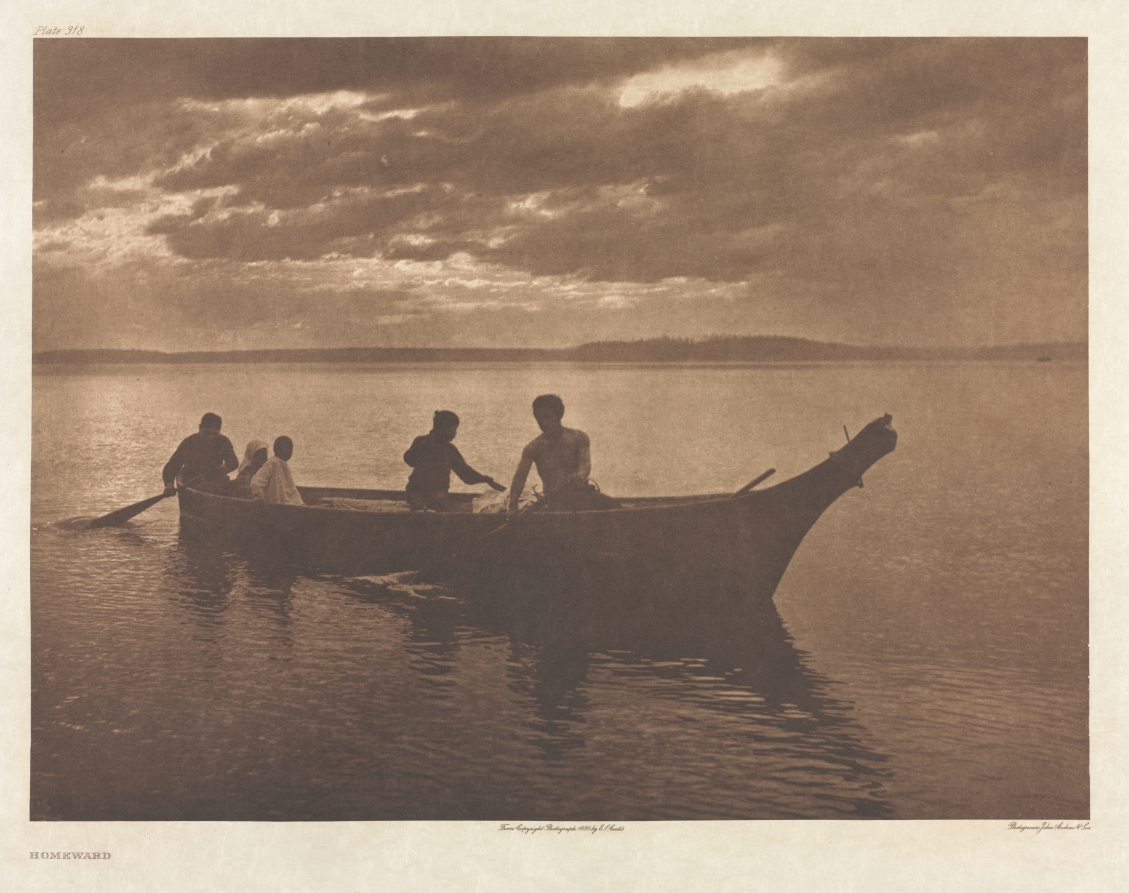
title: Portfolio IX, Plate 318: Homeward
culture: America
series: The North American Indian: being a series of Portfolios picturing and describing the Indians of the United States, the Dominion of Canada, and Alaska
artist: Edward S. Curtis (American, 1868–1952)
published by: The University Press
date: 1898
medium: photogravure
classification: Portfolio